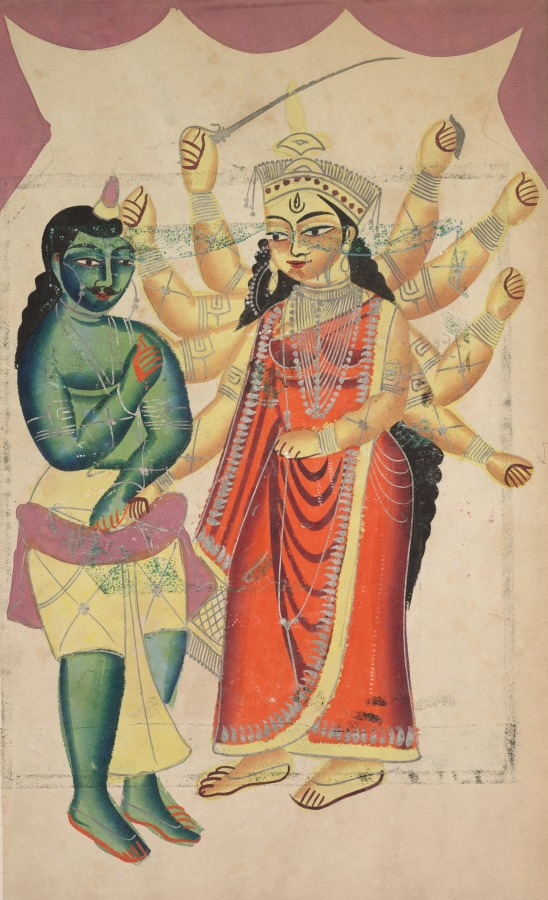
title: Durga (verso), from a Kalighat album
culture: Eastern India, Bengal, Kolkata, Kalighat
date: c. 1890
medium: Gum tempera, graphite, ink, and tin on paper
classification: Painting